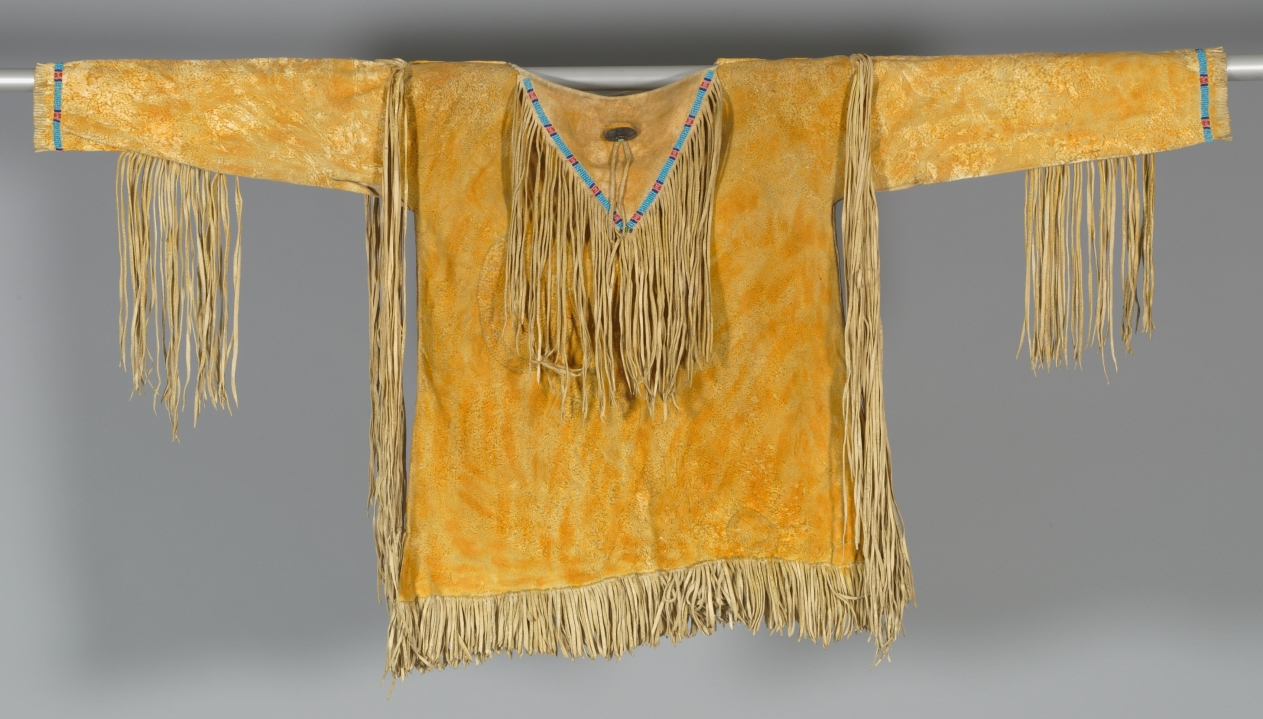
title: Beaded Shirt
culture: America, Native North American, Plains, Gaigwu (Kiowa), Post-Contact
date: late 1800s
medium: beaded leather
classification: Garment